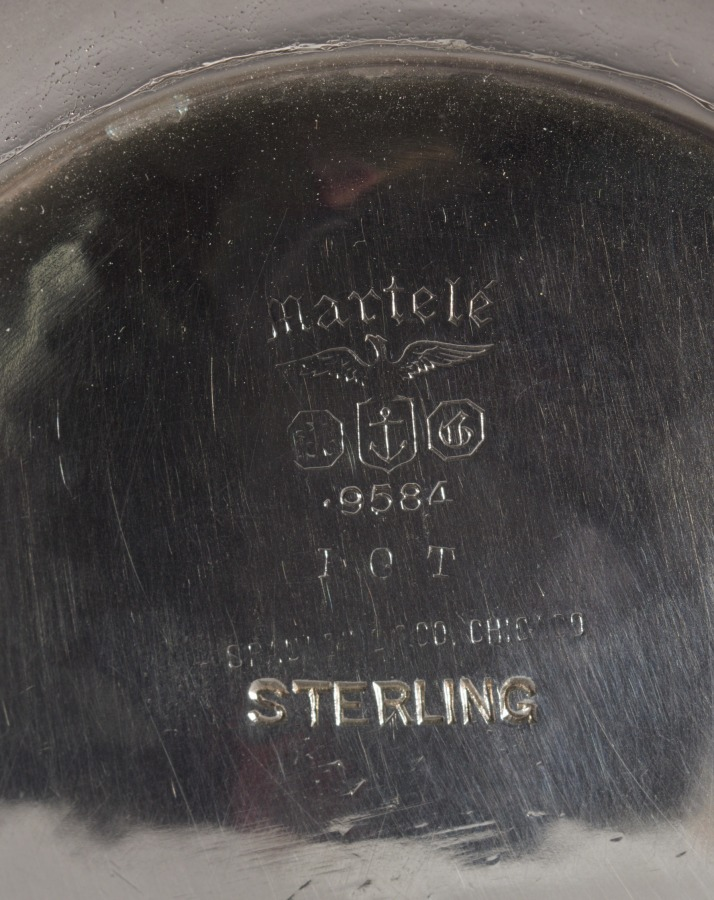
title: Martelé Coffee Service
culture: America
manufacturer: Gorham Manufacturing Company (America, est. 1831)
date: c.1900–1910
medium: silver, ivory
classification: Silver